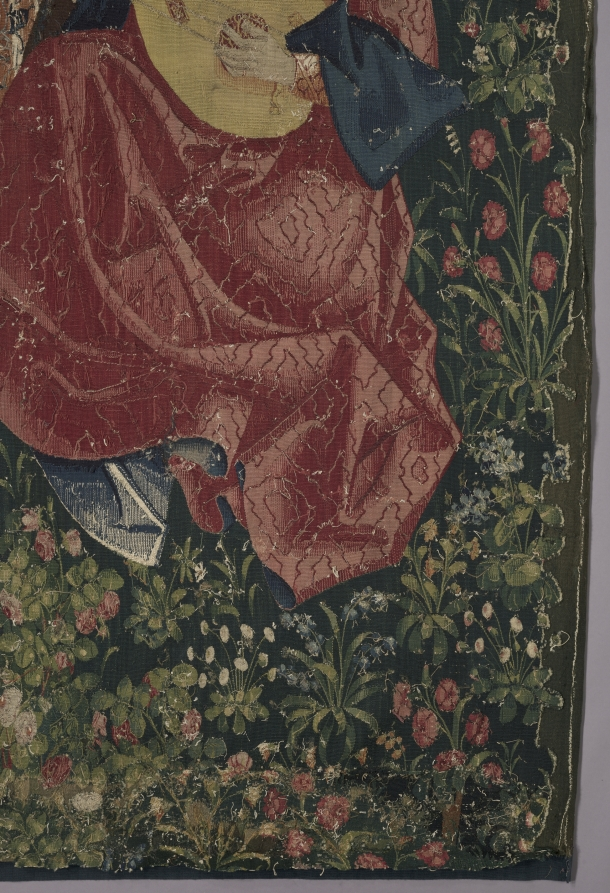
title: Youth (from Chateau de Chaumont set)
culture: France, Lyon(?), early 16th century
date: 1512–15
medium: silk and wool; tapestry weave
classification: Tapestry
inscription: French verse in Gothic letters translates as follows: Youth triumphs while its heart is healthy, And when it seems to hold all in its hand. But this triumph is without eternity. Here one sees the example full well: Those who are happy hide death in thier heart. Let the young heed this warning.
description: Louise of Savoy (1476-1531), queen mother of King Francis I, is depicted here in a sumptuous brocaded velvet in the center. She addresses youthful figures including Éléonore, Pierre Sala’s daughter who is facing her future husband, Hector. On the right, King Louis XII (died 1514) stands in front of the Chateau Langais where he had married Anne of Brittany. Above is Hector’s deceased father with a partially concealed skull under his robe, while a woman expresses surprise at the sight. The verse in Old French at the top states that youthful happiness is not eternal: Youth makes sounds as long as its heart is healthy, And thinks that it holds all in its hand. But this triumph is not eternal. Here you see clearly an example: He that is happy has death in his breast. Of this you people should take note.